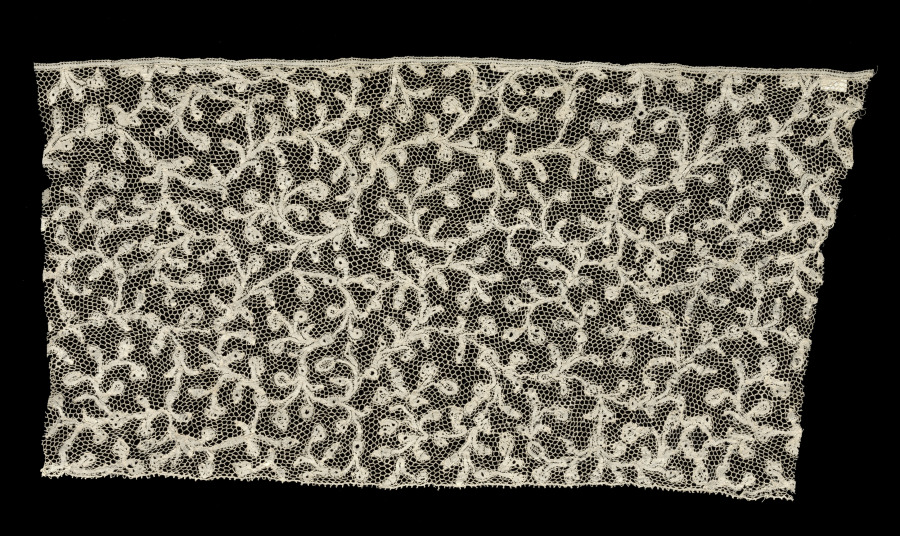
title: Fragment of Lace Flounce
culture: Italy, Milan(?)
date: 1800s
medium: Linen: bobbin lace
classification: Lace